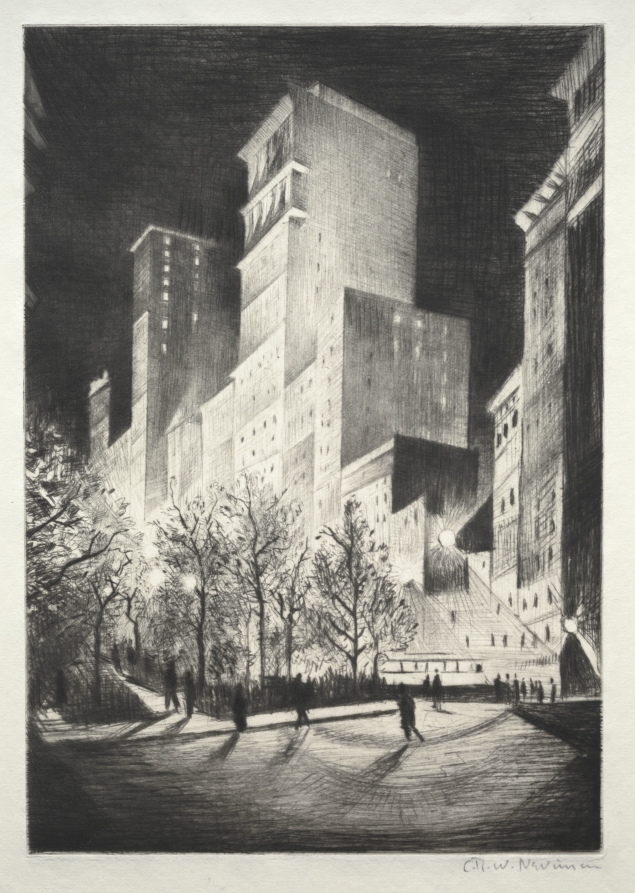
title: Three AM: A Corner by Madison Avenue (also known as 2 AM New York and Metropolis)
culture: England, 20th century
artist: Christopher Nevinson (British, 1889–1946)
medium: drypoint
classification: Print